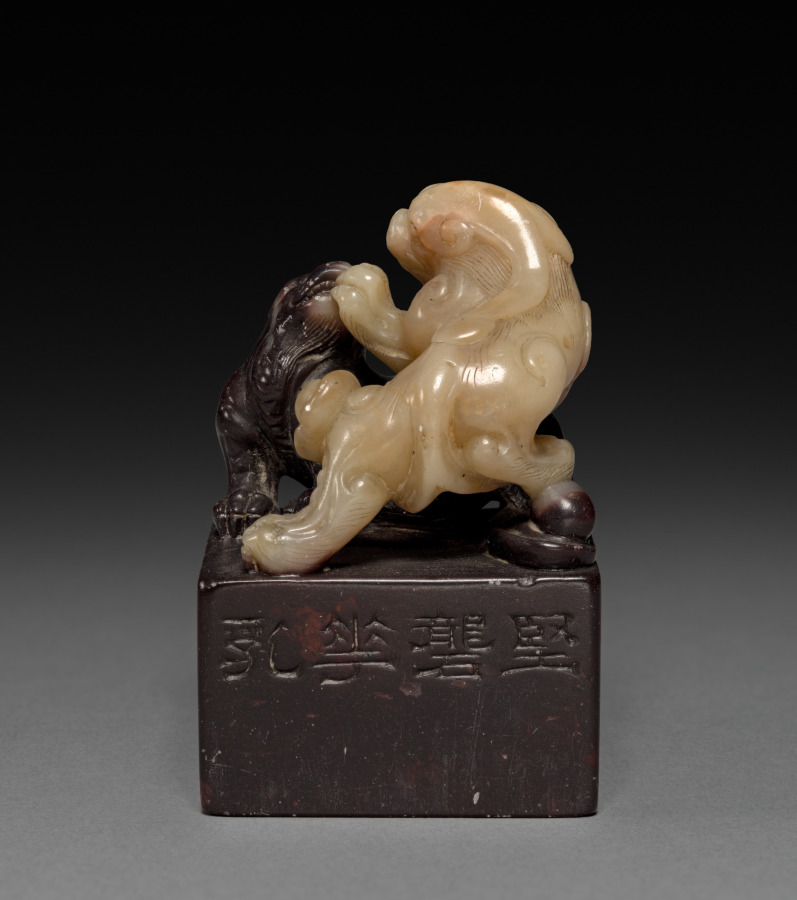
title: Seal with Two Qilin Playing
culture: China, Qing dynasty (1644-1911)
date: 1849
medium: onyx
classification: Stone